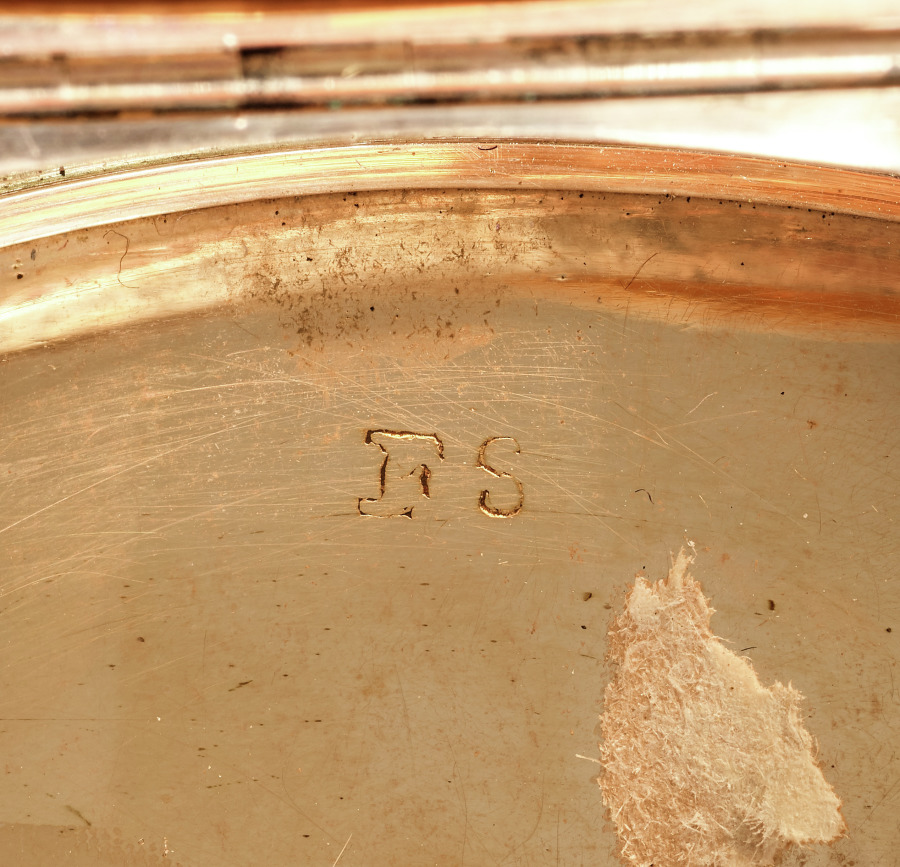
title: Box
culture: Switzerland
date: late 1700s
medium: gold and enamel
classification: Miscellaneous